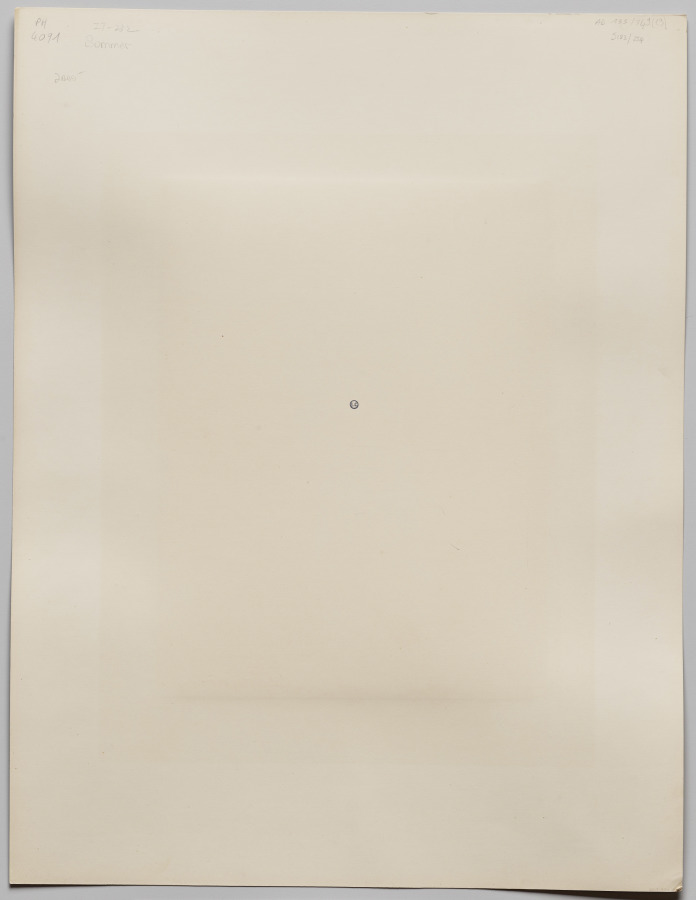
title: Farnese Hercules, Museum of Naples, Italy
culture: Italy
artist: Giorgio Sommer (Italian, 1834–1914)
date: c. 1860s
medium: albumen print from collodion negative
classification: Photograph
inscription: Imprinted in grey ink on recto: "No. 4402. Ercole farnese (Museo Napoli)"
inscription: Written in pencil on verso: "PH/ 6091"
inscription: Written in pencil on verso: "IT-232/ Sommer"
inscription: Written in pencil on verso: "2000-"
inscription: Written in pencil on verso: "AD 135 / 349 (19)/ 5183 / 254"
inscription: Stamped in black ink on verso: "I.C.(cirlced)"